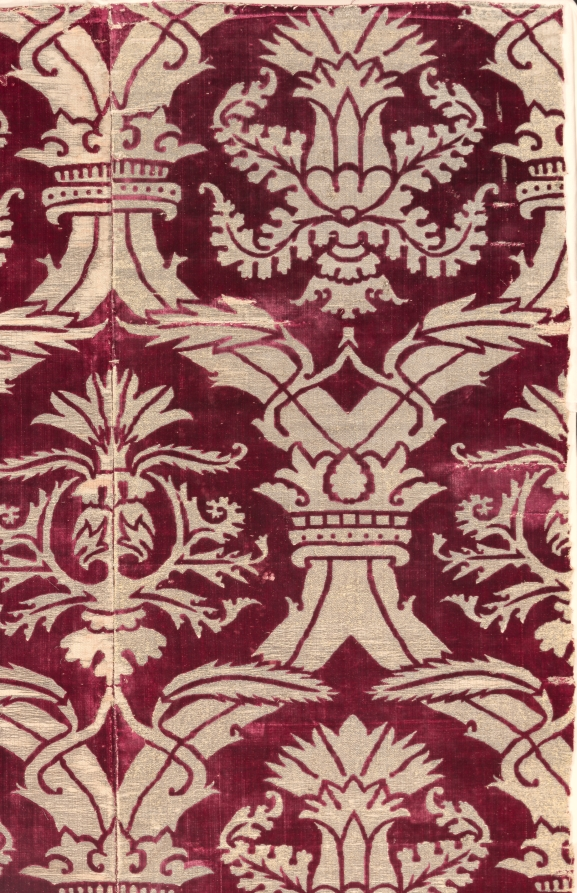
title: Brocaded Velvet Panel with Italianate Pattern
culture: Turkey, Istanbul or Bursa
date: 1575–1625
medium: Silk: velvet, brocaded; gilt-metal thread and cotton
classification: Velvet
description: Rarely are four fabric widths preserved together from any culture. This gilt-metal thread pattern combines Turkish and Italian features: the large ogival (curved) lattice clasped by crowns and the velvet structure are Turkish, and the two so-called artichoke designs are enlarged adaptations of Italian motifs. A symbol of wealth and power, this velvet panel was woven during the artistic height of the Ottoman Empire in the late 1500s. It may have covered a divan (sofa) or possibly enhanced a wall during cold winters in the imperial Topkapi Palace in Istanbul.